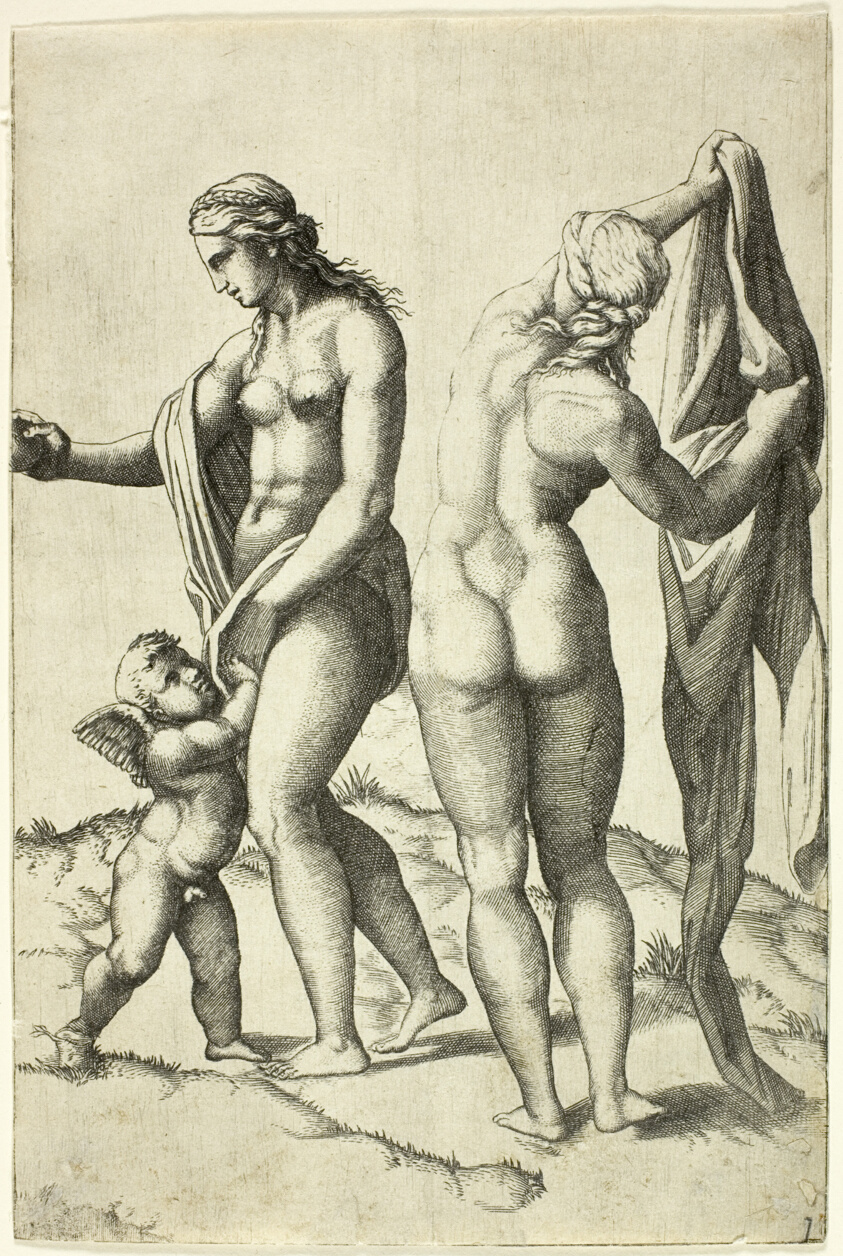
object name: Print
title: Venus, Cupid and Pallas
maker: School of Marcantonio Raimondi (Italian, c. 1480-1534); after Raffaello Sanzio, called Raphael (Italian, 1483-1520)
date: 16th century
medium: Engraving in black on ivory laid paper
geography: Italy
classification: engraving; print; prints and drawing